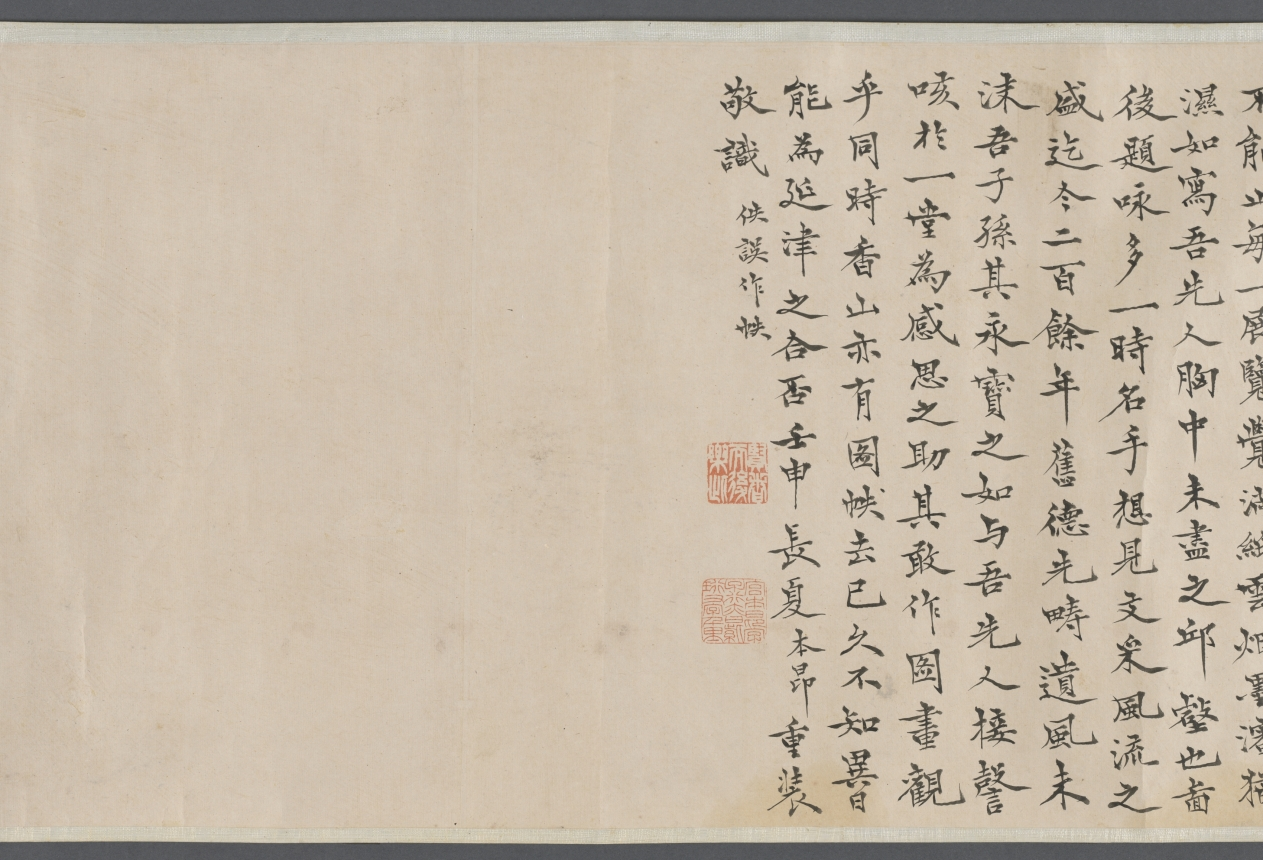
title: Spring Rain Thatched Hut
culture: China, Qing dynasty (1644-1911)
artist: Wang Jianzhang (Chinese, active 1621–1662)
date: 1650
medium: handscroll, ink on paper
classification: Drawing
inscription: Title by Wu Zhiying 吳芝瑛 (1868–1933), dated 1910.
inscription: 春雨草堂圖。庚寅仲春，為紫玄社兄畫於若耶溪上。 仲初王建章。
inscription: 12 colophons by Gong Weiliu’s 宮偉鏐 (1611–1680) contemporaries: Fang Gongqian 方拱乾 (1596–1667, jinshi of 1628); Jiang Cai 姜埰 (1607–1673); Liang Yizhang 梁以樟 (1608–1665); Du Shaokai 杜紹凱 (also named Du Jie 杜岕, 1617–after 1689), dated 1648; Zhao Kaixin 趙開心 (d. 1663), dated 1647; Zhao Erbian 趙而忭 (d. 1658); Yu Yaoguang 余耀光, dated 1649; Yao Quan 姚佺, dated 1648; Chen Taisun 陳台孫 (b. 1611, jinshi of 1640); (Monk) Shao 韶; Du Zhujin 杜祝進; and Tang Shi 唐時.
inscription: 此研田莊居士王建章為先太史紫元公所作春雨草堂圖也。居士字仲初，明崇禎間人，與先太史及惲香山相友善。喜畫佛像，自謂不讓李公麟。山水祖述董源，筆力雄健，有不可羈勒之概。香山稱其墨有五采，非世人所知。然性廉重，非同志不輕落筆，人得其寸圖尺縑，必相與忻賞，如獲蜼彝兕敦，非人世間物也！見先太史筆記，此圖寫雨景，而氣韻生動，勃勃於不能止。每一展覽，覺滿紙雲烟，墨瀋猶濕，如寫吾先人胸中未盡之邱壑也。圖後題詠，多一時名手，想見文采風流之盛。迄今二百餘年，舊德先疇，遺風未沫。吾子孫其永寶之，如與吾先人接謦咳於一堂，為感思之助，其敢作圖畫觀乎！同時香山亦有圖佚去己久，不知異日能為延津之合否。壬申長夏本昂重裝敬識。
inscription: Collectors' seals including: Gong Ben'ang 宮本昂 (1821–1874); Lian Qian 廉泉 (1868–1932); Wu Zhiying 吳芝瑛 (1868–1933)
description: With its striking simplicity, this painting captures the pure serenity of a private garden in the moist atmosphere of a spring morning on a small river. Painted in the style of Ni Zan, Wang Jianzhang dedicated this work to his patron-friend Gong Weiliu (1611-1680). Gong retired from government service after the fall of the Ming dynasty and constructed a garden-retreat at his native home in Taizhou, Jiangsu province. He invited scholars and poets from his literary society to contribute writings of his estate, which are here mounted together with the painting in this scroll.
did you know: Gong Weiliu, the owner of the estate portrayed here, had received his prestigious jinshi degree in 1643, but his official career was thwarted by the collapse of the Ming dynasty the following year.